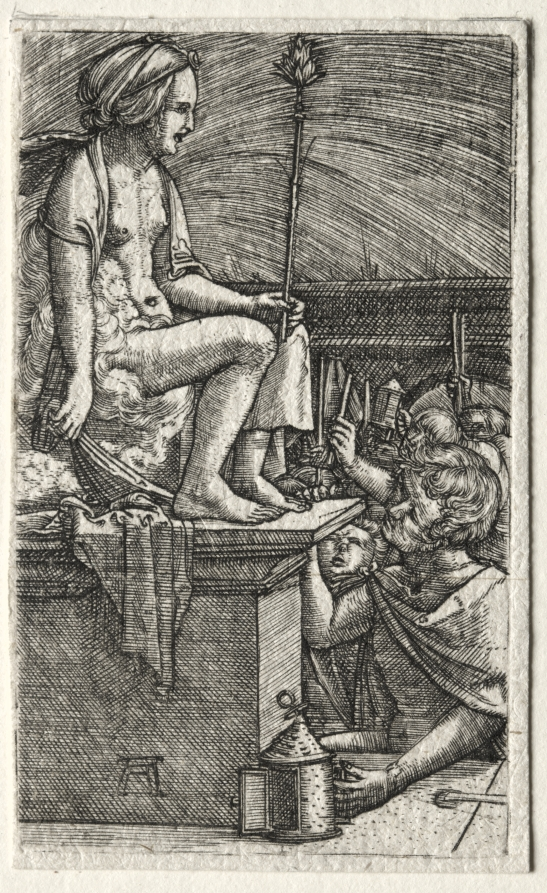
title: The Roman Courtesan or The Revenge of the Sorcerer Virgil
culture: Germany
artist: Albrecht Altdorfer (German, c. 1480–1538)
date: 1520–1526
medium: engraving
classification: Print